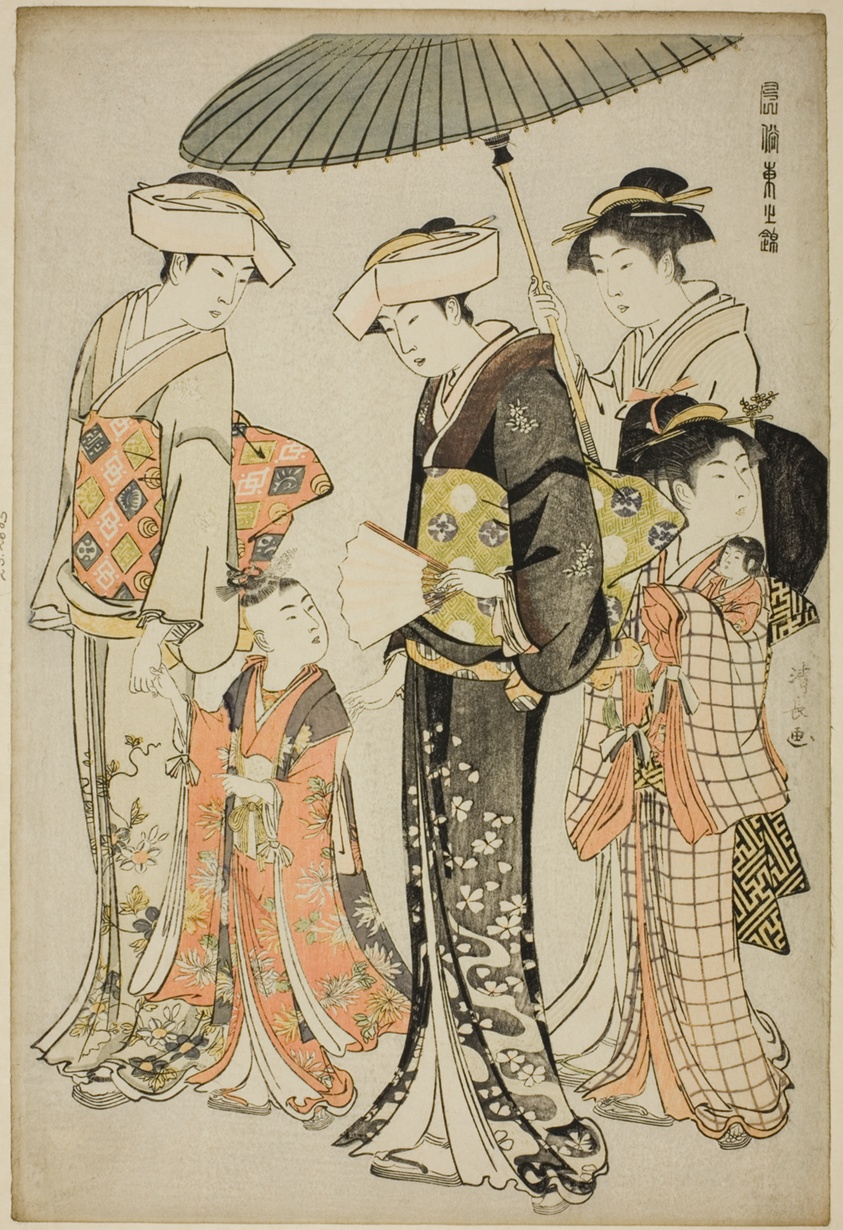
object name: Print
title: A Girl and Four Servants, from the series "A Brocade of Eastern Manners (Fuzoku Azuma no nishiki)"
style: Japanese (culture or style)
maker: Torii Kiyonaga (Japanese, 1752-1815)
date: c. 1783/84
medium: Color woodblock print; oban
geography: Japan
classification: woodblock print; print; asian art